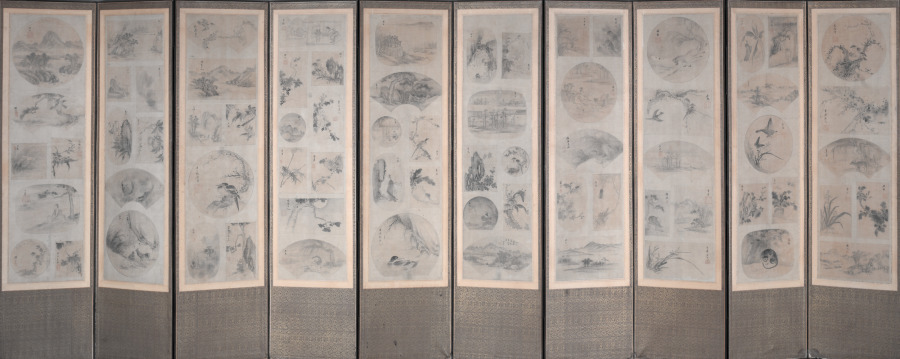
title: Painting of One Hundred Themes (obverse)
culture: Korea, Joseon dynasty (1392–1910)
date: late 1800s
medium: Ten-panel folding screen affixed with album leaves (obverse), calligraphy (reverse), ink and color on silk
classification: Painting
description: This screen depicts paintings on one side and poems on the other—an economical format often used in Korea to allow the viewer to enjoy both sides of one screen. The front features an assortment of bird-and-flower, landscape, and figural paintings executed according to the brush manner of more than 50 artists. A calligrapher has brushed several Chinese poems about the four seasons on the reverse side, among them "Composing in the Daytime of Summer" by Tang poet Liu Zongyuan (773–819) and "Composing when Spring Begins" by Song scholar Zhang Shi (1133–1180).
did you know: Depicting small images of various subjects became one of the most popular types of painting toward the end of the 19th century.